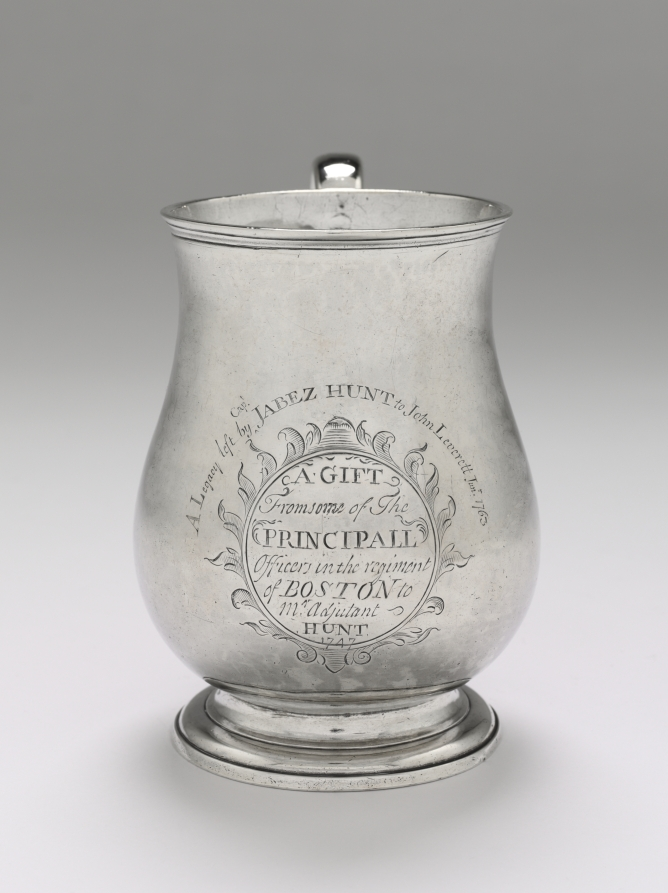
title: Cann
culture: America, Massachusetts, Boston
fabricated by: Jacob Hurd (American, 1702–1758)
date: 1747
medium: silver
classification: Silver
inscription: engraved within reserve on front, opposite handle: "A GIFT/From some of The/PRINCIPALL/ Officers in the regiment/of BOSTON to/Mr Adjutant/HUNT/1747." Above the reserve: "A Legacy left by Capt JABEZ HUNT to John Leverett Junr 1763."